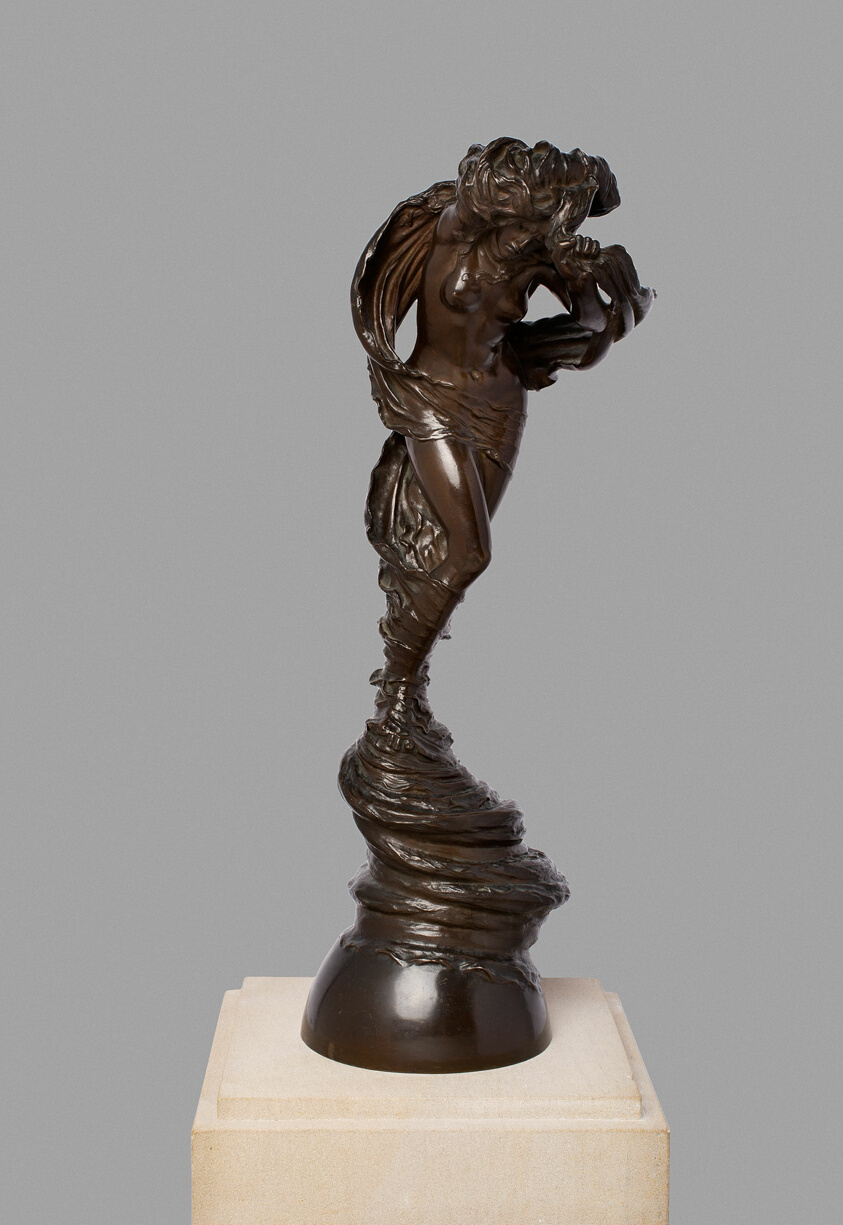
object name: Sculpture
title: Whirlwind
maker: Jonathan Scott Hartley (American, 1845–1912); Cast by A.T. Lorme; New York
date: 1896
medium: Bronze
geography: New York City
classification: sculpture; american arts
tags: people, portraits